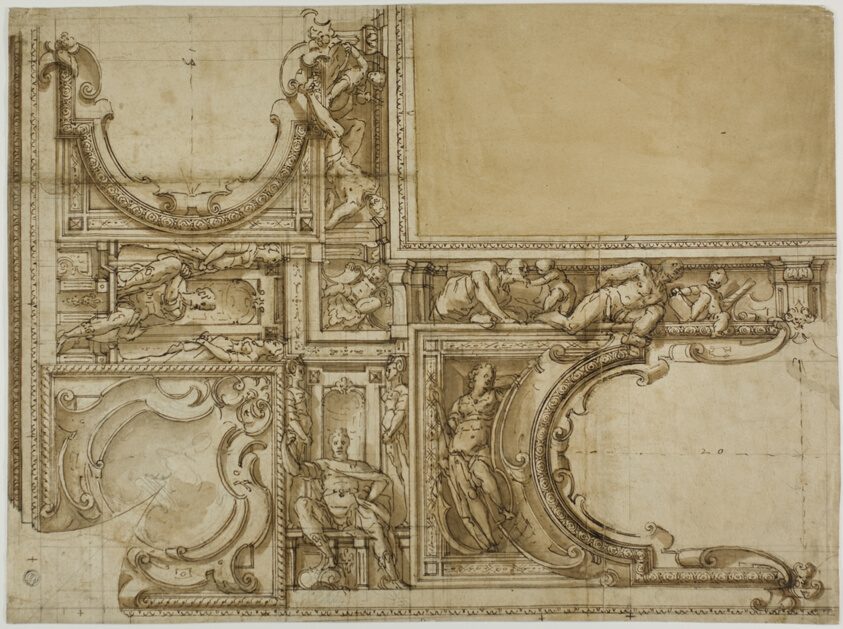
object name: Drawing and Watercolor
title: Design for a Ceiling Decoration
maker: Lazzaro Tavarone (Italian, 1556-1641)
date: 1590/1614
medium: Pen and brown ink with brush and brown wash, over black chalk, on ivory laid paper, pieced and partially laid down on cream laid paper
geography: Italy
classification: ink and wash; drawings (visual works); prints and drawing